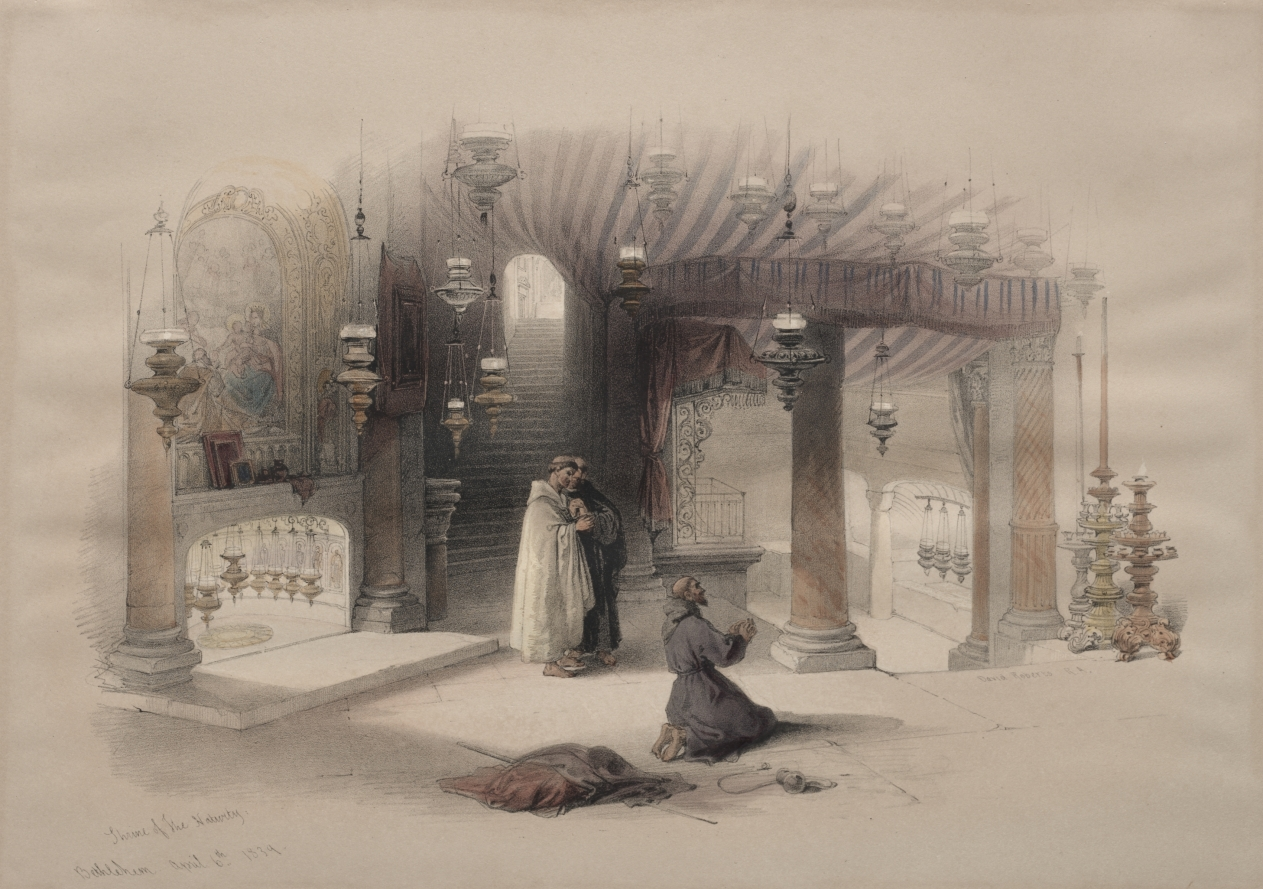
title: Shrine of the Nativity, Bethlehem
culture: England, 19th century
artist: David Roberts (Scottish, 1796–1864)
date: 1839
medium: color lithograph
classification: Print